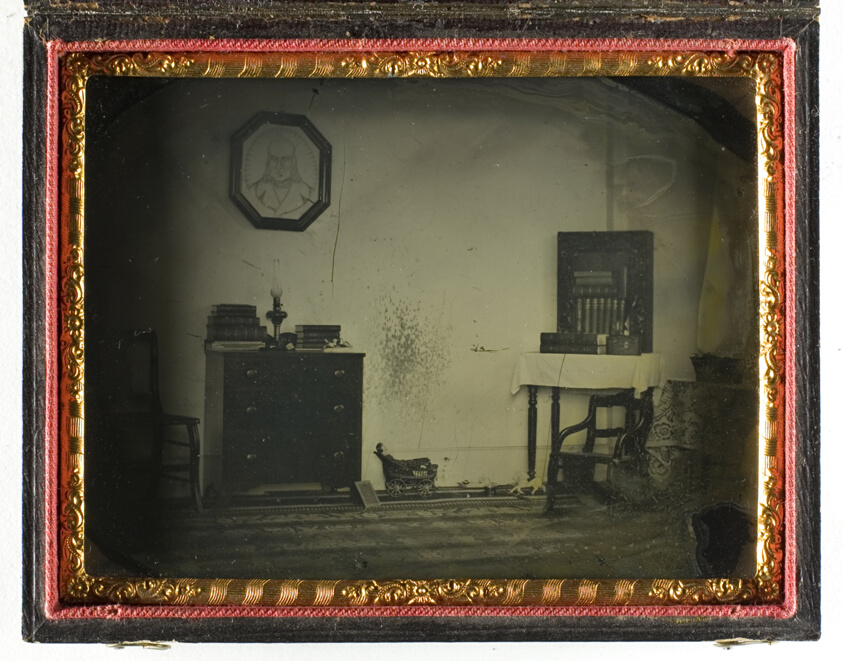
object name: Photograph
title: Interior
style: 19th century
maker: Artist unknown; American, 19th century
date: c. 1856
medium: Ambrotype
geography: United States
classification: ambrotype; photographic process; photography; photograph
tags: Collected by Hugh Edwards